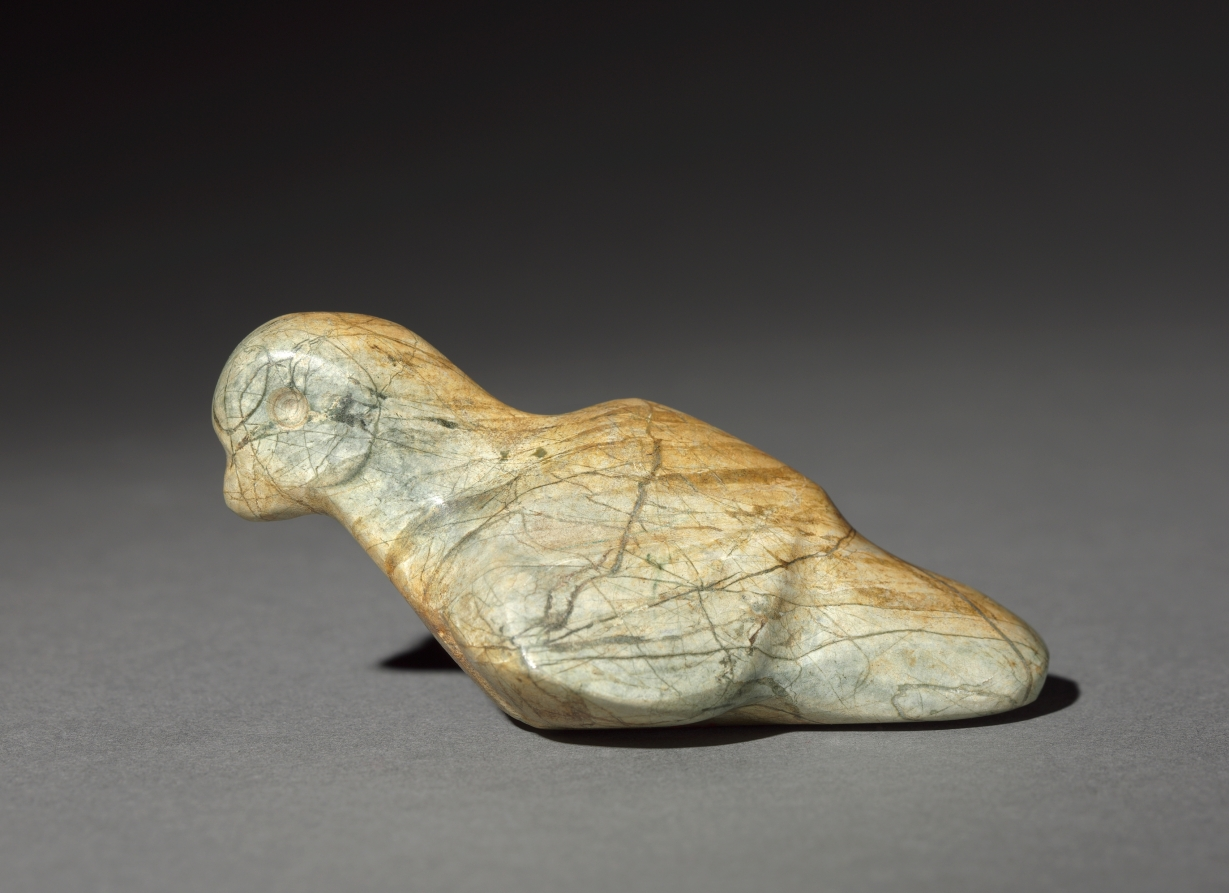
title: Bird Pendant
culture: Mesoamerica, Mexico, Guerrero, Mezcala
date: 100 BCE–300 CE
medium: polished gray-brown stone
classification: Sculpture